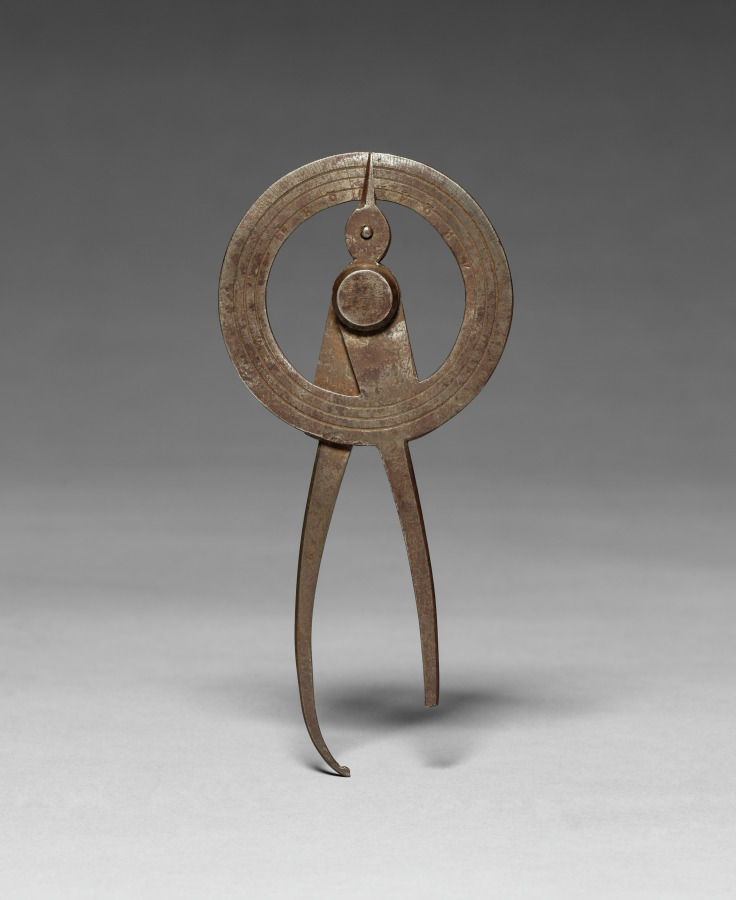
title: Inside and Outside Calipers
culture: Europe, 18th century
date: 1700s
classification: Tool